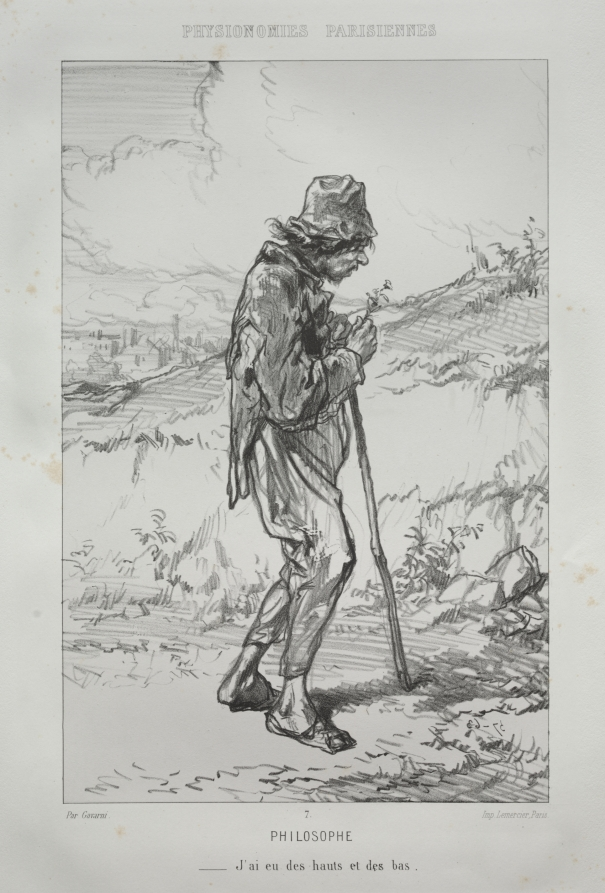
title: Philosophe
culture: France, 19th century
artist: Paul Gavarni (French, 1804–1866)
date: c. 1857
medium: lithograph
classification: Print